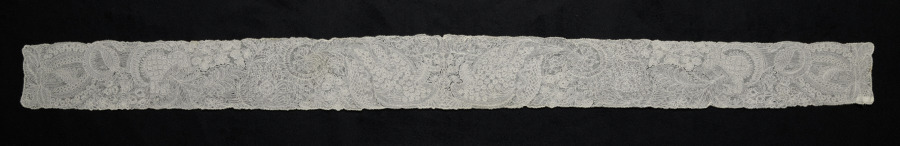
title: Lace Lappet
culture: Flemish, Brussels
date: 1700–1750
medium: Linen: bobbin lace (point d'Angleterre)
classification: Lace